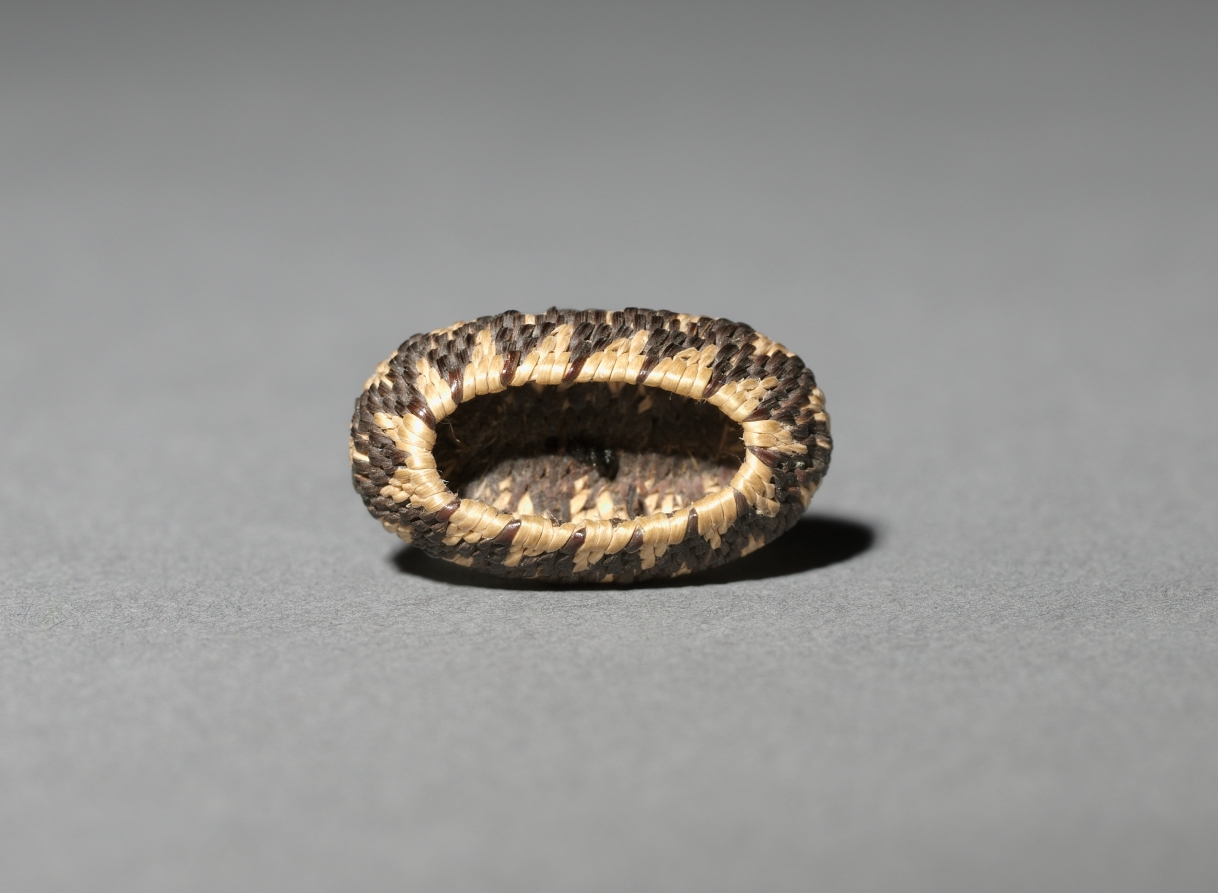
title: Miniature Rhomboidal Basket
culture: California, Pomo, late 19th-early 20th century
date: late 1800s-early 1900s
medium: plant materials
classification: Basketry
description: Miniature baskets were made to demonstrate the basket-maker’s virtuoso skill, and these tiny marvels seem to be no exception—the smallest are just a few millimeters wide but still patterned. For such fine work, dexterity was required as much for preparation of materials as for weaving.